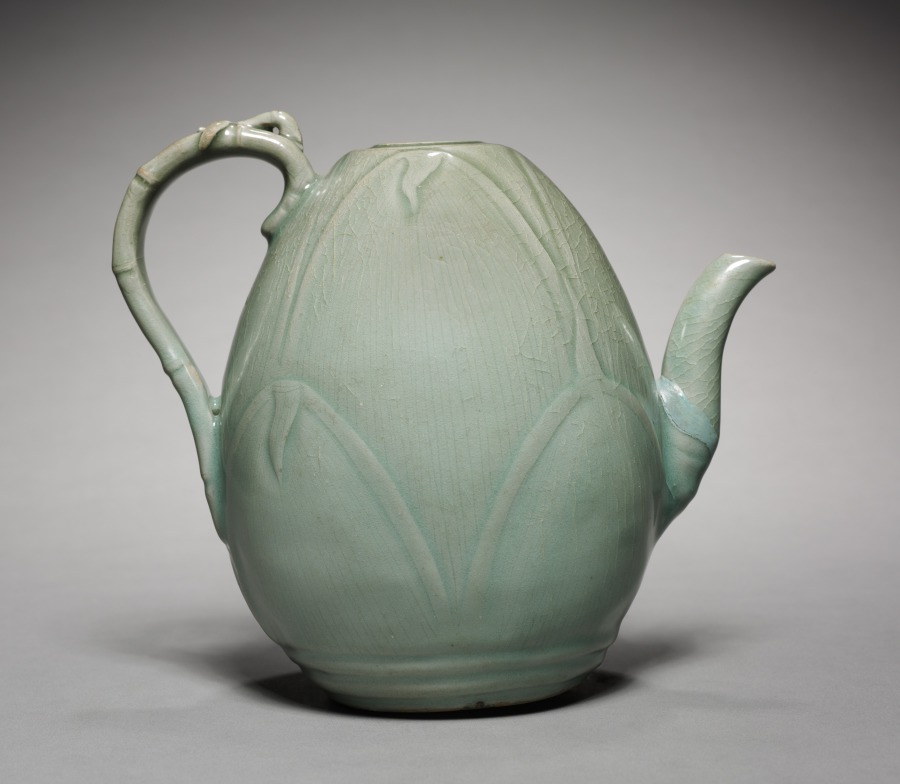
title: Wine Ewer with Incised Bamboo Shoot Design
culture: Korea, Goryeo dynasty (918–1392)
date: 1100s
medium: celadon ware with incised decoration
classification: Ceramic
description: Natural motifs inspired the shape of celadon vessels as well as their inlaid designs in the Goryeo period. This wine ewer is shaped like a bamboo shoot, but it also resembles a lotus bud. Even though the spout was repaired, the ewer is a masterpiece of Goryeo period celadon. Ewers of the same shape are now housed at the National Museum of Korea and the Museum of Oriental Ceramics, Osaka.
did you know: This type of ewer is supposed to have a tight-fitting lid, which is currently missing.